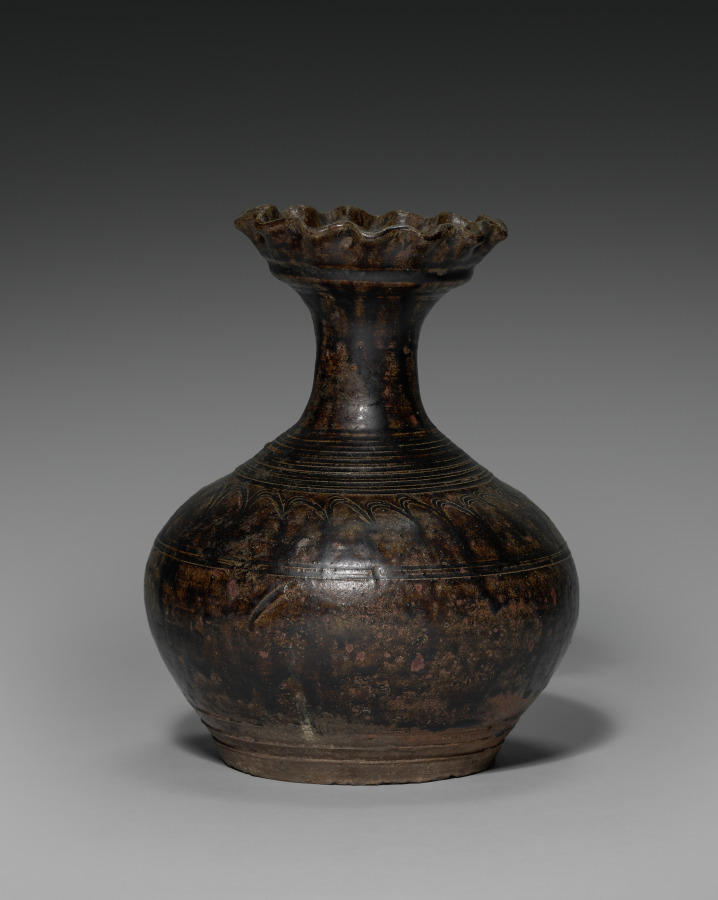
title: Khmer Vase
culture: Cambodia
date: 1100s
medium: earthenware with dark brown glaze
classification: Ceramic